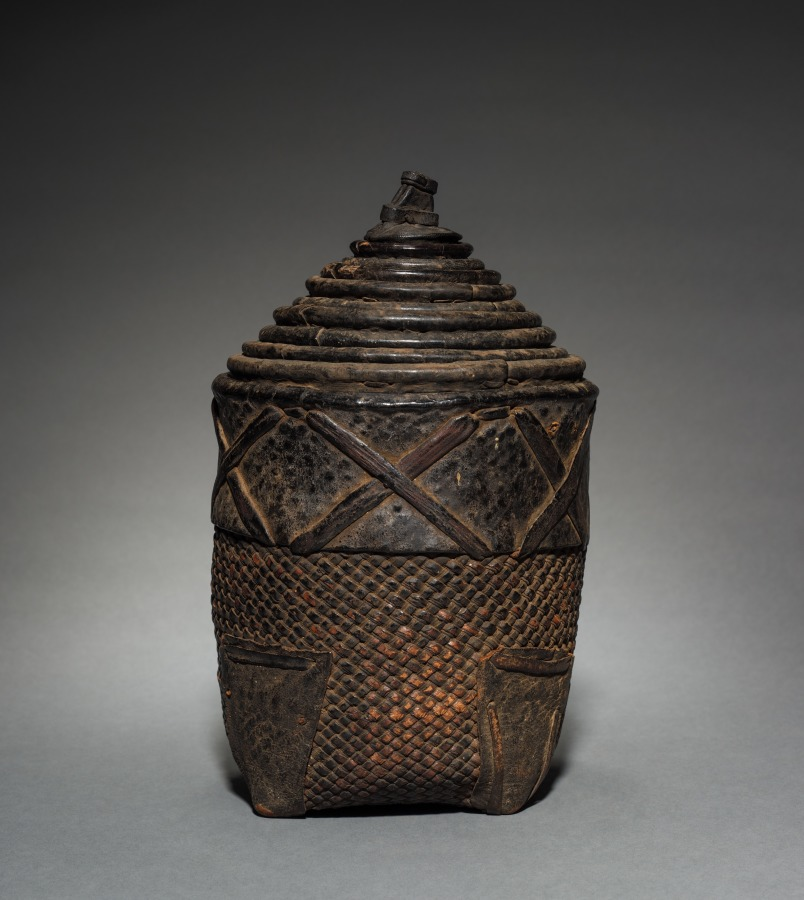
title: Set of Nesting Wedding Baskets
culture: Africa, Western Sudan, Burkina Faso, Lobi, 20th century (?)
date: c. 1900s ?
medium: Plant fiber and leather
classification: Vessels